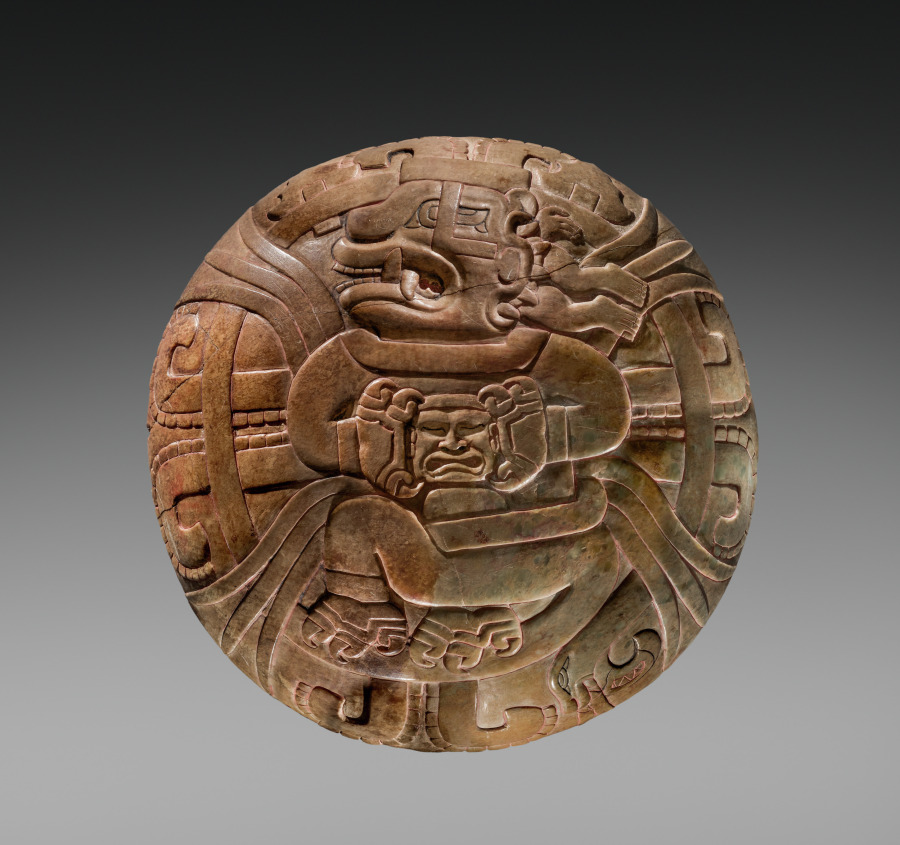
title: Plate with Supernatural Being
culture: Central Andes, north coast, probably Jequetepeque Valley, Cupisnique people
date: 900–600 BCE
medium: stone (probably steatite [soapstone])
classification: Ceramic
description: This plate is carved with a feline supernatural sacrificer who holds a severed human head in its clawed paws. The diagonal clusters of plant foliage at the figure’s shoulders and hips imply that death is tied to the earth’s fertility, one being a precondition for the other. The figure, therefore, may be an apotheosis of the life-death cycle.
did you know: The supernatural figure on this small plate may be an apotheosis of the life-death cycle.